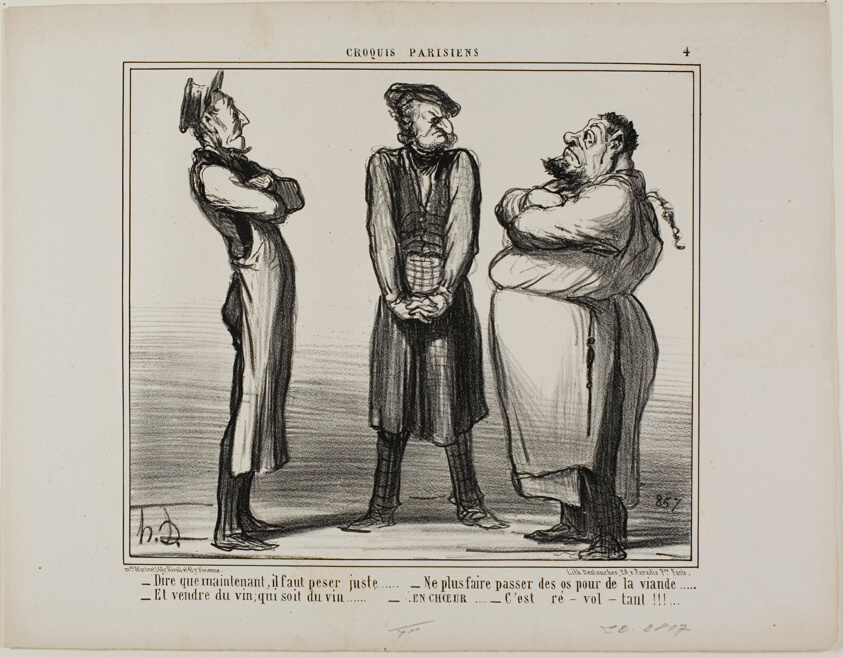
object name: Print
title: “- Incredible... but we now have to give the exact weight! - and we can no longer sell bones for meat - and wine really has to be wine! - all together now: It's DISGUSTING!,” plate 4 from Croquis Parisiens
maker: Honoré Victorin Daumier; French, 1808-1879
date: 1856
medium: Lithograph in black on ivory wove paper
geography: France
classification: lithograph; print; prints and drawing